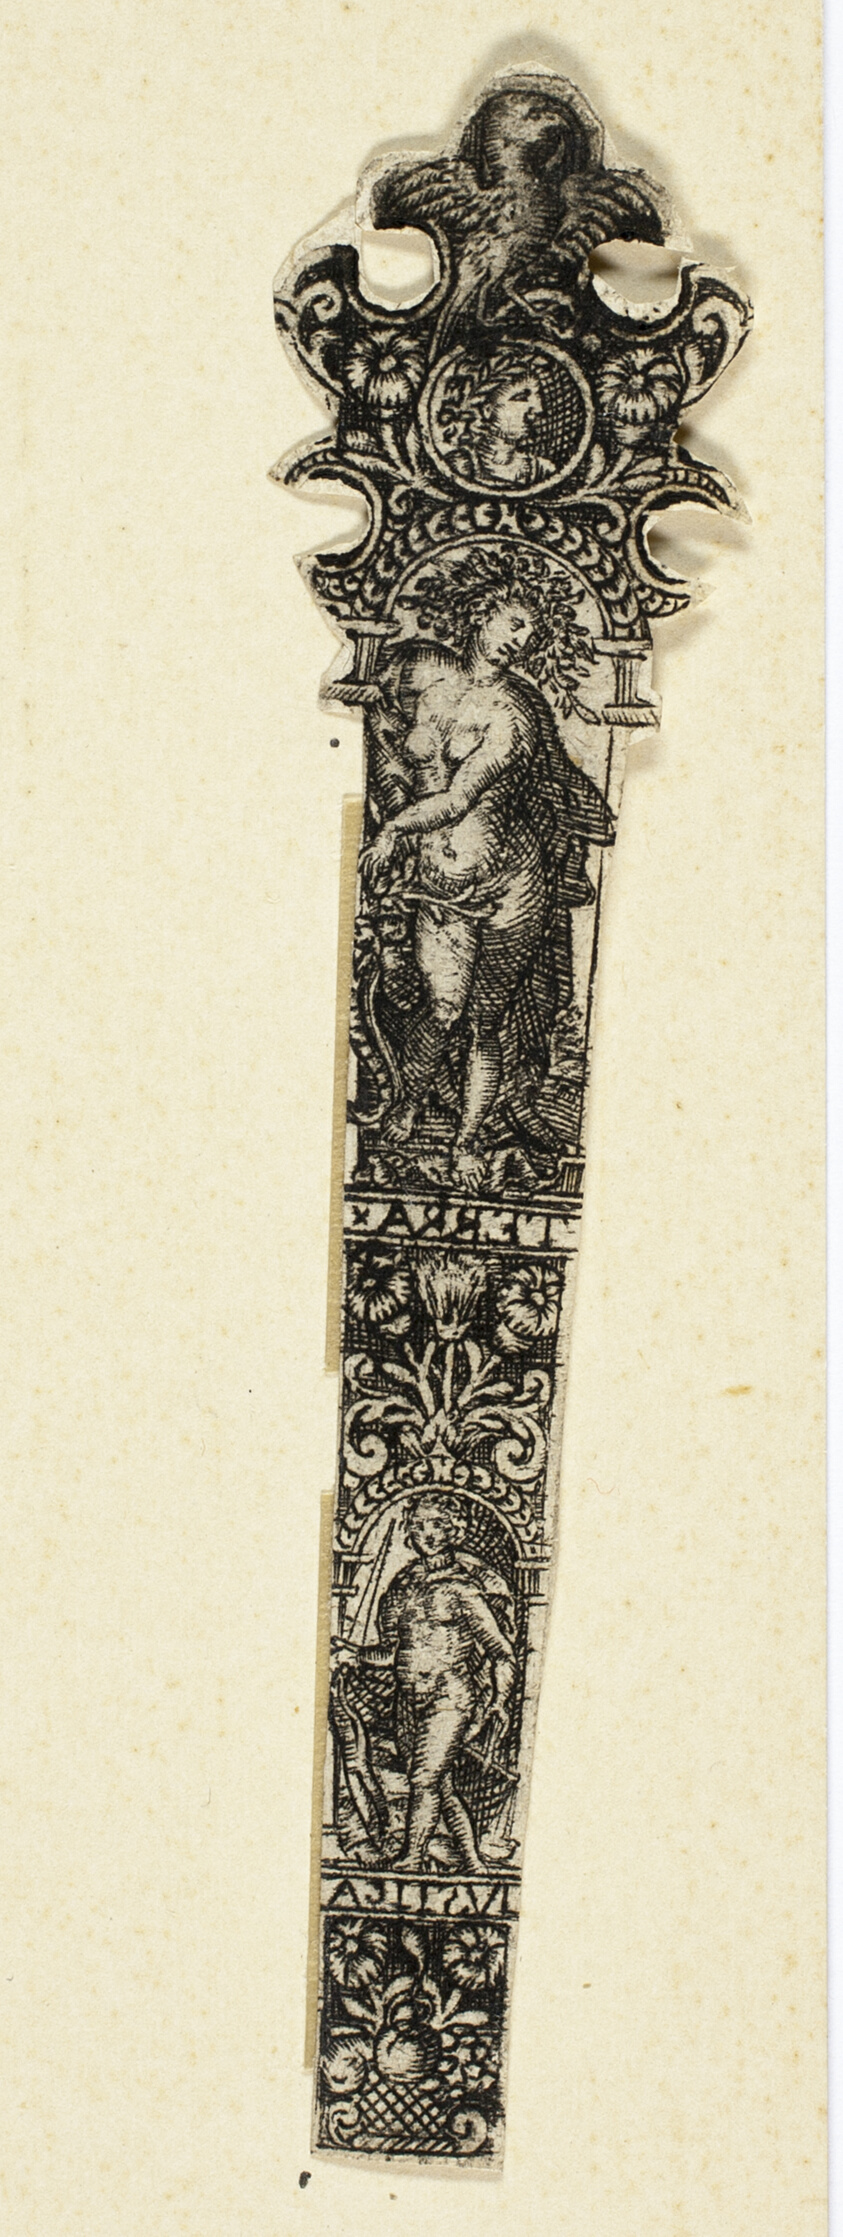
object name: Print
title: Ornamental Design for Knife Handle with Earth, from The Four Elements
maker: After Johann Theodor de Bry; German, 1561-1623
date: c. 1590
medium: Engraving in black on ivory laid paper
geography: Flanders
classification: engraving; paper; print; prints and drawing